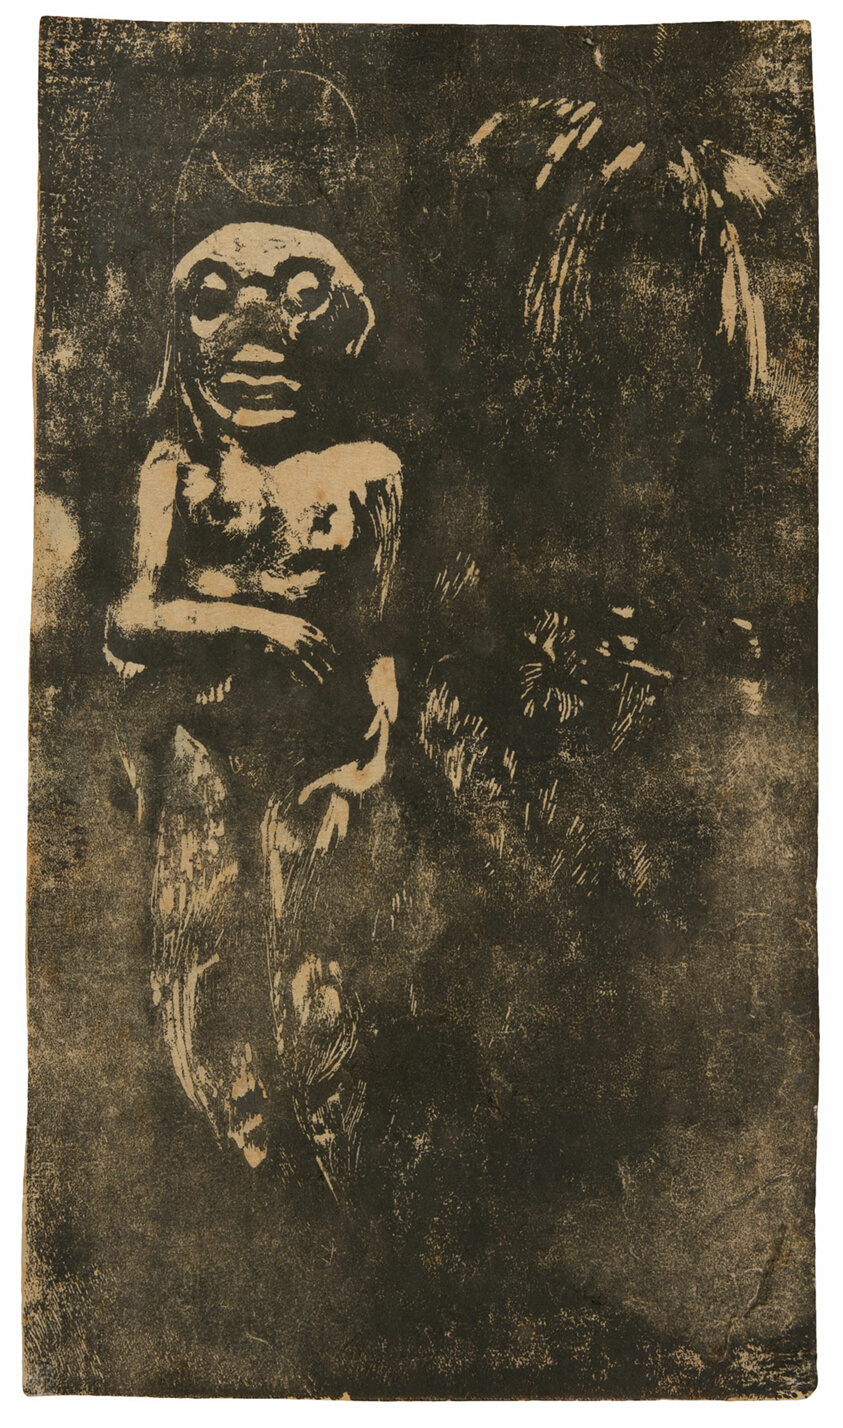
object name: Print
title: Oviri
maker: Paul Gauguin (French, 1848-1903)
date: 1894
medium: Wood-block print in black ink on cream wove Japanese paper, laid down on cream wove Japanese paper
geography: France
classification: woodcut; print; prints and drawing